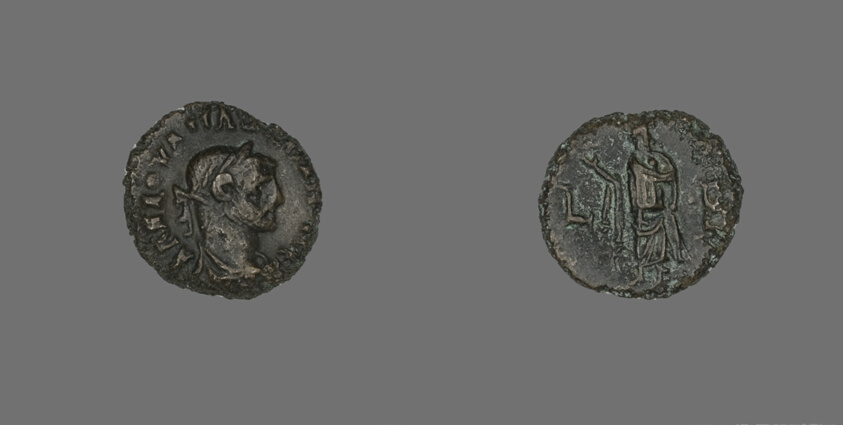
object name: Coin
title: Coin Portraying Emperor Maximianus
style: greco-roman (egyptian)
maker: Roman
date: 287-288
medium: Billon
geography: Alexandria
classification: coin; ancient art